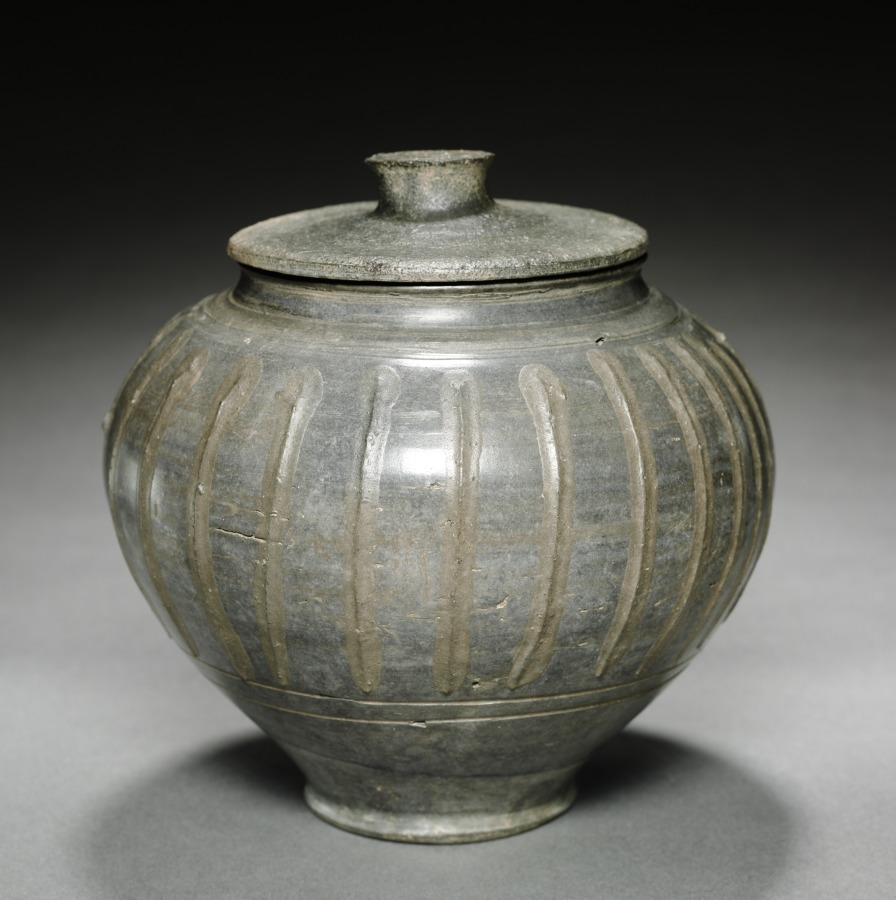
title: Pot with Cover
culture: Rhenish (Cologne), Gallo-Roman, 2nd century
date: 100–200 CE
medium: tan ware with gray and some brown burnished slip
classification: Ceramic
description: This elegant pot with its matching lid was made using a potter’s wheel, evident from the subtle horizontal rings that are visible across the belly of the vessel. The vertical ribs were added after the pot was removed from the wheel, using a thick clay paste. The vessel’s lid suggests that it was used for storage.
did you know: The shiny surface of this pot was made using a technique called burnishing, performed by polishing a surface with a hard, smooth object.